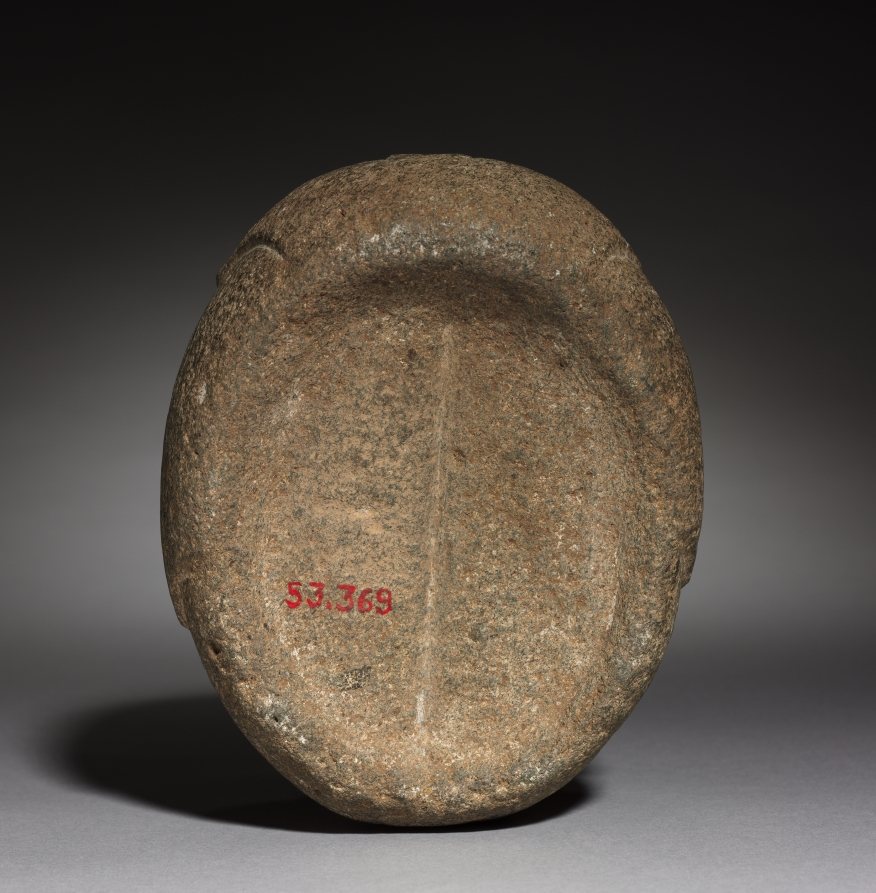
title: Head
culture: Mesoamerica, Mexico, Olmec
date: 1200–300 BCE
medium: stone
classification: Sculpture